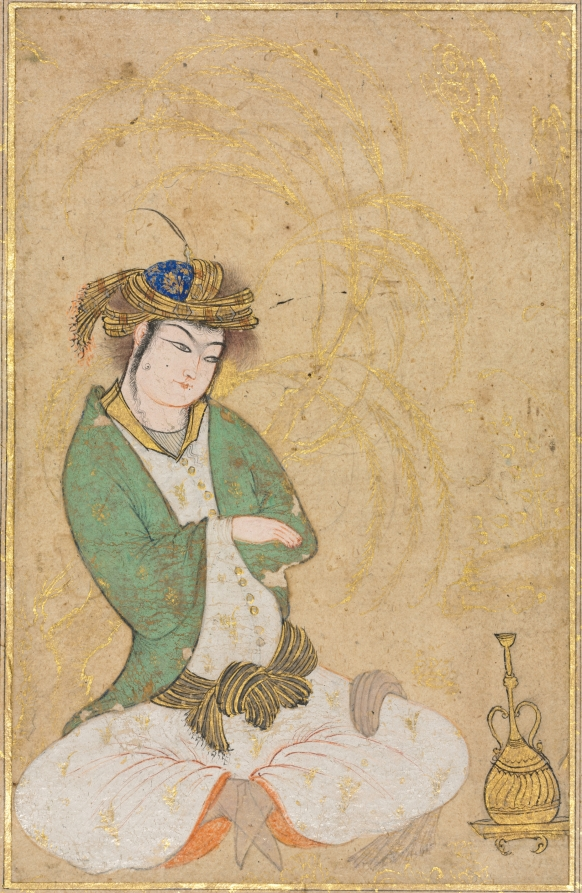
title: Youth Seated by a Willow; Single Page Illustration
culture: Iran, Isfahan, Safavid period (1501-1722)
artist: style of Muhammad Yusuf (Iranian)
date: c. 1600–1650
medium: ink, gold, and colors on paper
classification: Manuscript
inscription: Script: none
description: A new aesthetic developed under the socially and economically conscious Shah ’Abbas I (reigned 1587–1629). Single polychrome paintings of elegantly clad youth were produced in considerable number during the 1600s, primarily for people with means who collected them and had them mounted in albums. Instead of functioning as portraits, the images of these courtly figures express ideals of youth and beauty. This young man’s lavish sash and turban enriched with costly gold thread proclaim his high status.